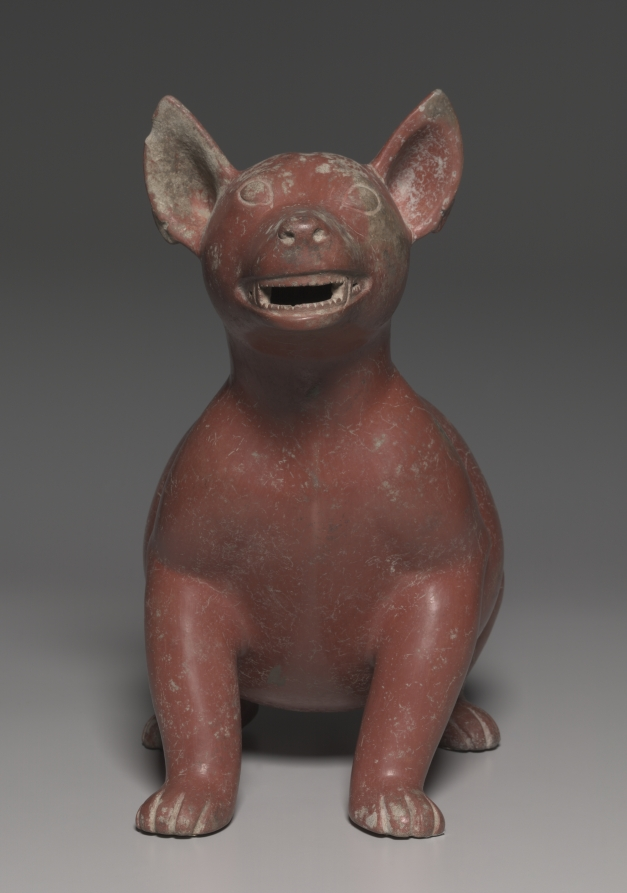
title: Male Dog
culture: West Mexico, Colima, Comala style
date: 200 BCE–300 CE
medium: earthenware with burnished red slip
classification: Sculpture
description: One of the best-known subjects of West Mexican tomb sculpture is the native hairless dog, which is shown naturalistically-as here-but also wearing a human mask, signaling complex meanings.These meanings are not well-understood, but like later Mesoamericans, West Mexicans may have believed that dogs served as guides or guards in the underworld realm of the dead. For the living, they also served as food.